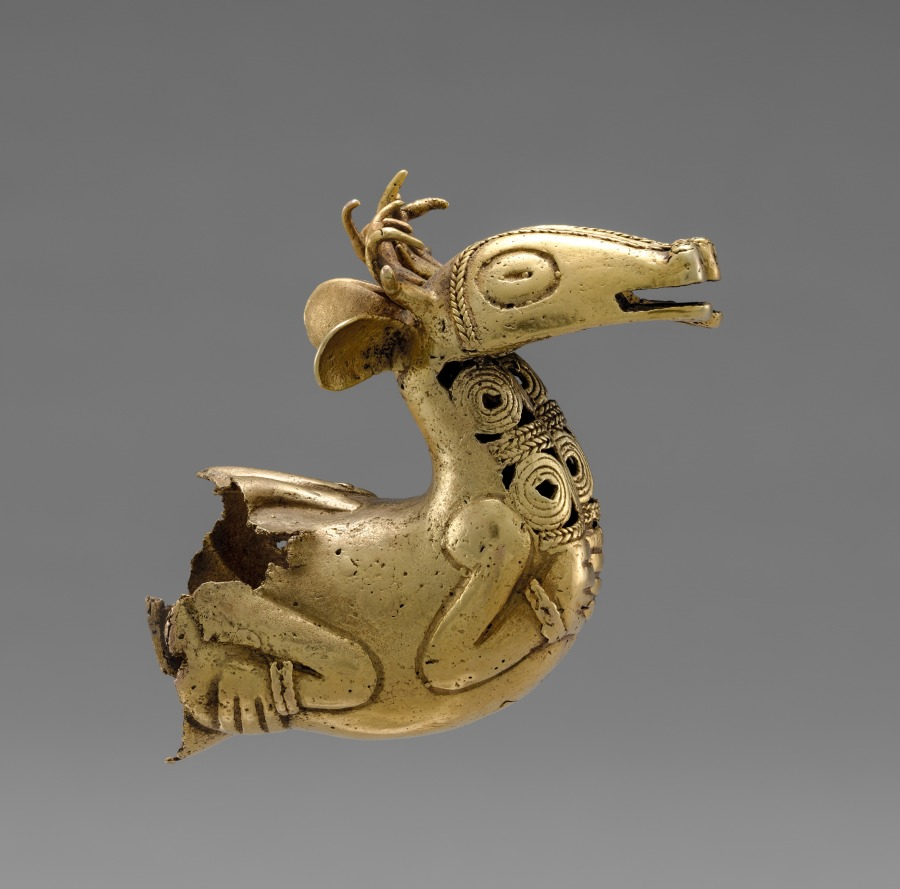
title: Finial with Two Deer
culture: Isthmian Region (Colombia), Sinú (Zenú), 5th century-11th century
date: 400–1000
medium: gold, cast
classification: Metalwork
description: Unique to Colombia's Sinú region are gold finials with sculptural images at right angles to thimble-like caps; the caps fit over the end of a staff, an emblem of rank that may have been held horizontally. This impressive finial features two deer (or a single creature with two deer heads) that hold human-like hands over their chests. Sinú animal imagery is understudied but may relate to beliefs about the cosmos. For instance, contemporary natives attribute importance to birds because they have the capacity to move among different environments (air, land, water); they may have been regarded as mediators among levels of the cosmos.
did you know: This exquisite finial was made using the lost-wax casting process.